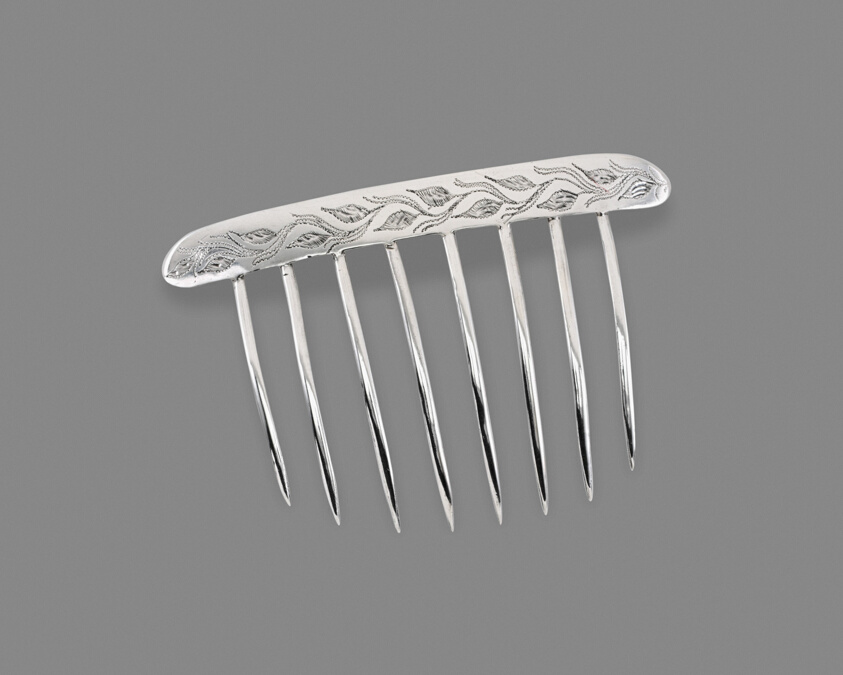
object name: Costume and Accessories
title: Comb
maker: William D. Rapp; American, active 1828–1850; Philadelphia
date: 1828–50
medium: Silver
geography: Philadelphia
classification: costume accessory - comb; silver; american decorative arts; american arts; decorative arts